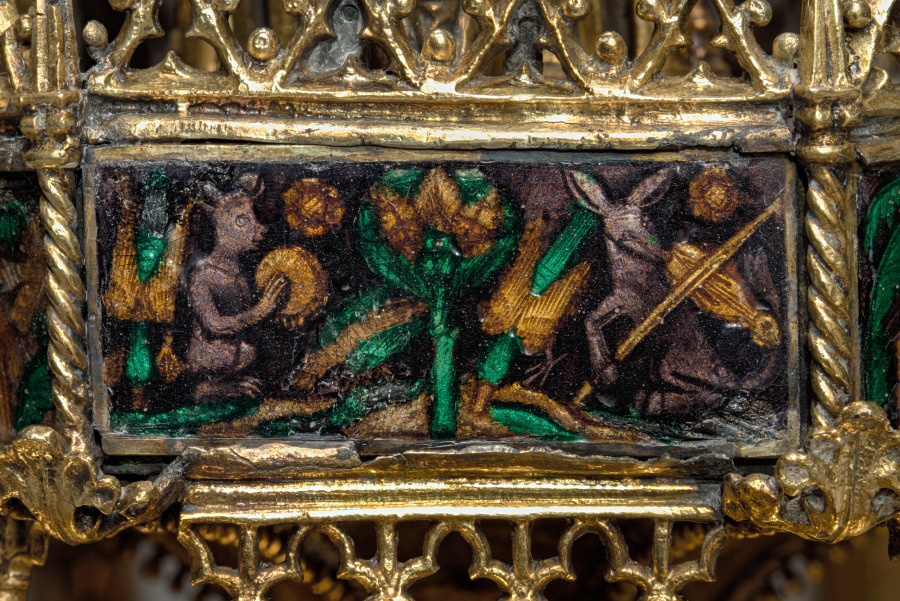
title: Table Fountain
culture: France, Paris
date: c. 1320–40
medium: gilt-silver and translucent enamels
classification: Metalwork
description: Conceptually and stylistically, this object is beyond all else a piece of Gothic architecture in miniature with vaults, pinnacles, columns, and traceried arches. Though the artist who created it is unknown, he was unquestionably inspired by the great Gothic buildings of his time. The table fountain is a three-tiered assembly combining cast elements with bent sheets of gilt-silver. To these have been attached a series of enamel plaques representing grotesque figures, some of which play musical instruments. Water wheels and bells were added to capture motion and sound. The rich detail, precious materials, and involved ornamentation of this deluxe object suggest it would have been expensive to produce and highly treasured by its original owner, someone of high status, and would have been deployed as an object of spectacle. This is the most complete example of its type known to survive from the Middle Ages. Medieval inventories reveal that small fountains like this, often taking various forms, and generally made from precious metals, once existed in large numbers, thus making the Cleveland table fountain an extremely rare object.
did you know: This fountain with its minute architectural details and finely made enamel plaques displayed the wealth and refinement of the owner as it entertained his guests. Imagine hearing the ringing of the tiny bells when this fountain was in use.